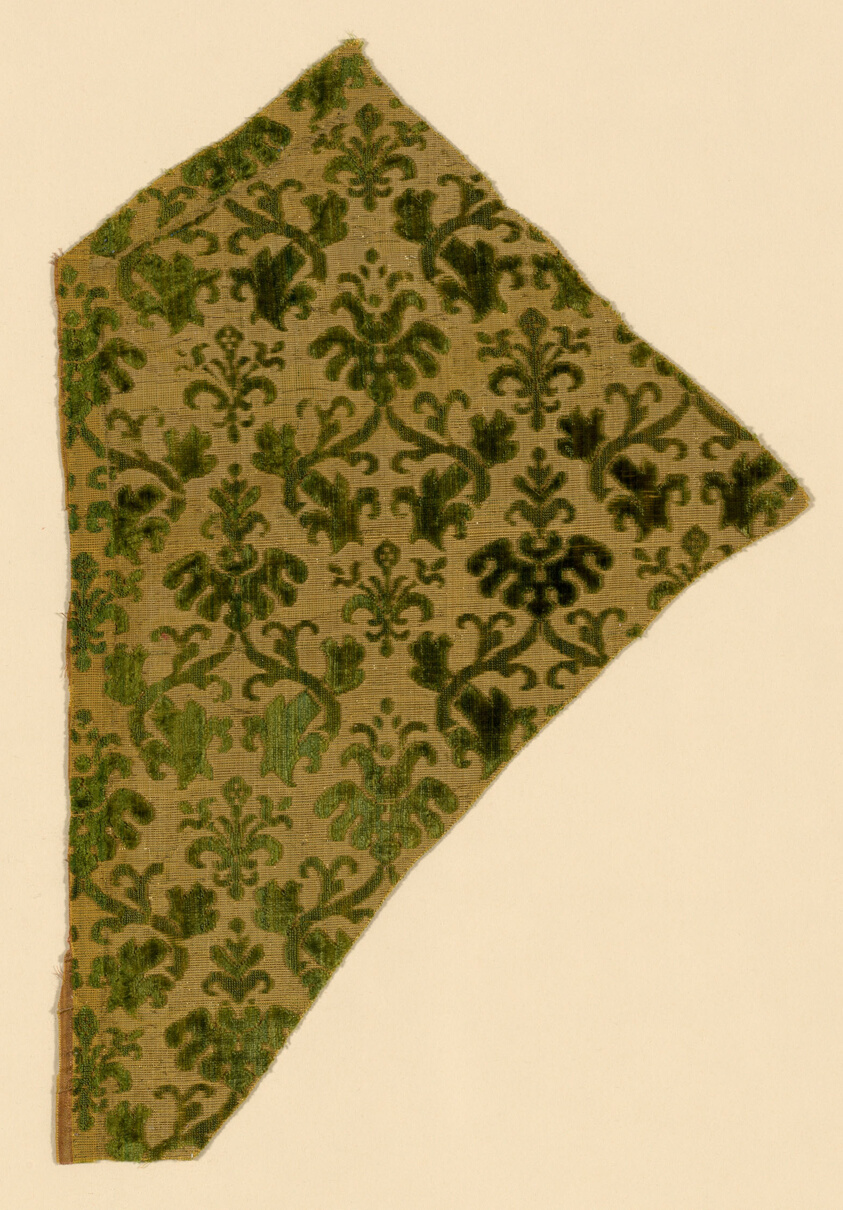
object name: Textile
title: Fragment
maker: Italy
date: 1625/50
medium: cisele voided cloth velvet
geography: Italy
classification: textile; weaving - velvet